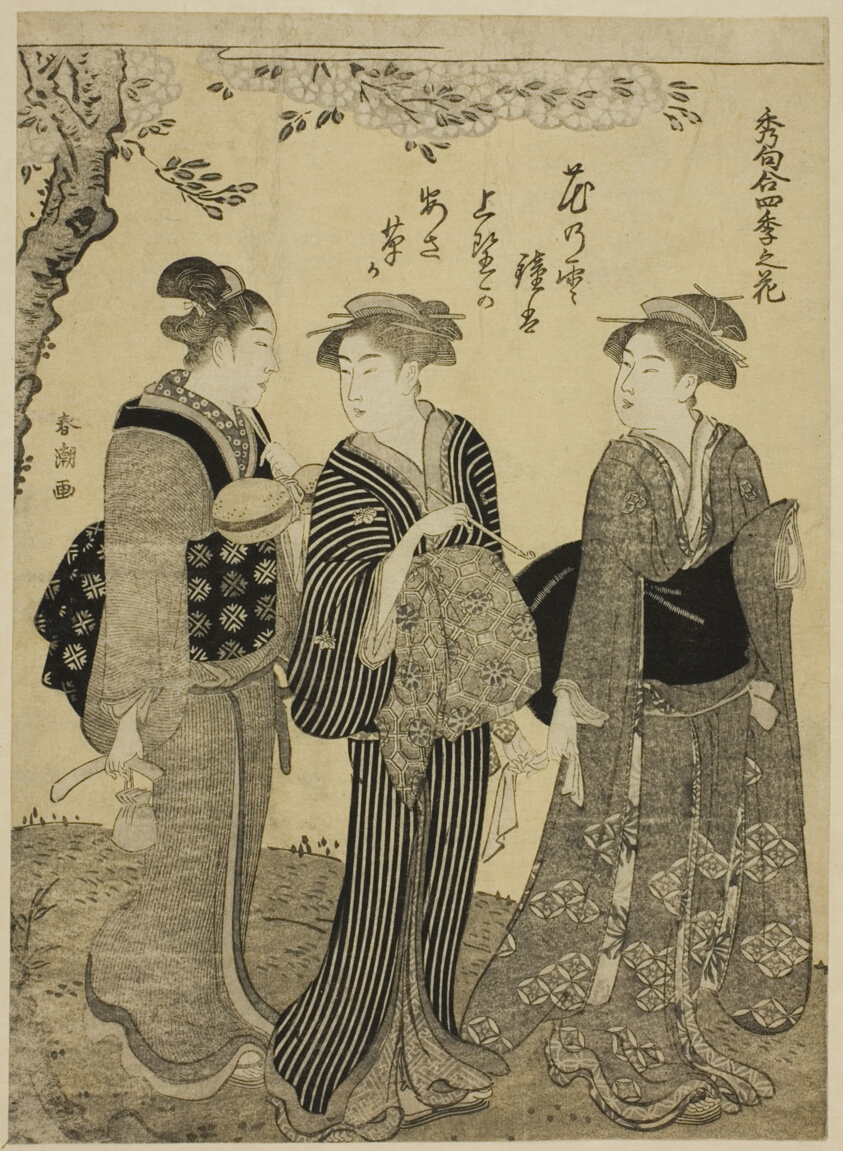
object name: Print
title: Cherry Blossoms in Spring, from the series "Choicest Odes upon Flowers of the Four Seasons (Shuku awase, shiki no hana)"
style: Japanese (culture or style)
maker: Katsukawa Shuncho; Japanese, active c. 1780-1801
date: c. 1792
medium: Color woodblock print; chuban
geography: Japan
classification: woodblock print; print; asian art